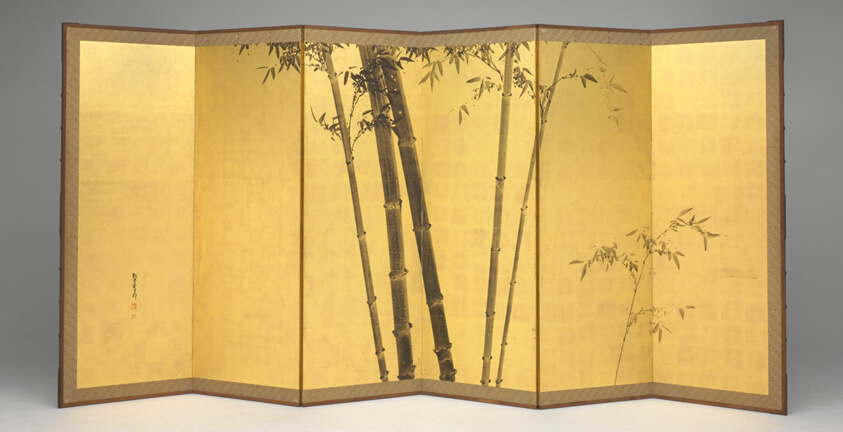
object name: Painting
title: Bamboo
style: Japanese (culture or style)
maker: Kishi Ganku (Japanese, 1749-1838)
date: early 19th century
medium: Pair of six-panel screens; ink and gold leaf on paper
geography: Japan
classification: painting